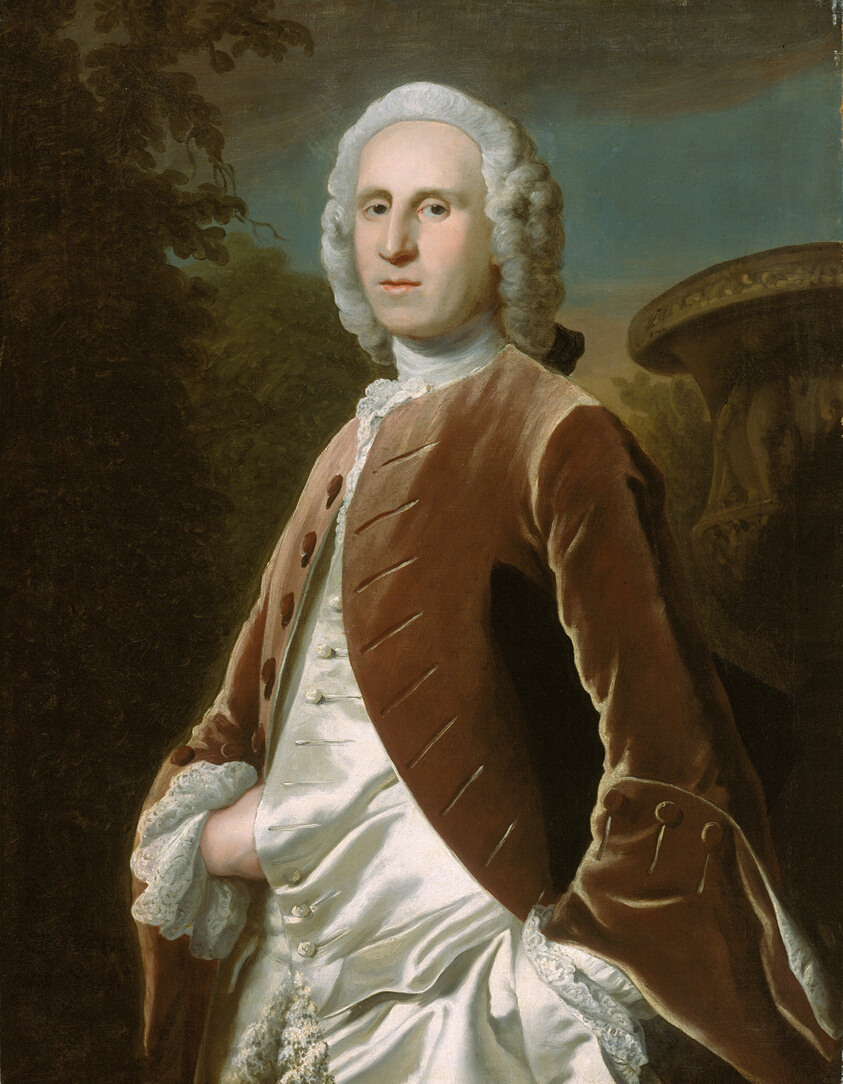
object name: Painting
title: Freeman Flower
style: 18th Century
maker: Joseph Highmore (British, 1692-1780)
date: 1747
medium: Oil on canvas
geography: England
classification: oil on canvas; british; oil paintings (visual works); paint; portrait; painting; european painting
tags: portraits: male subject, clouds, sky, trees, foliage, vase, landscape, man, portraits, portrait